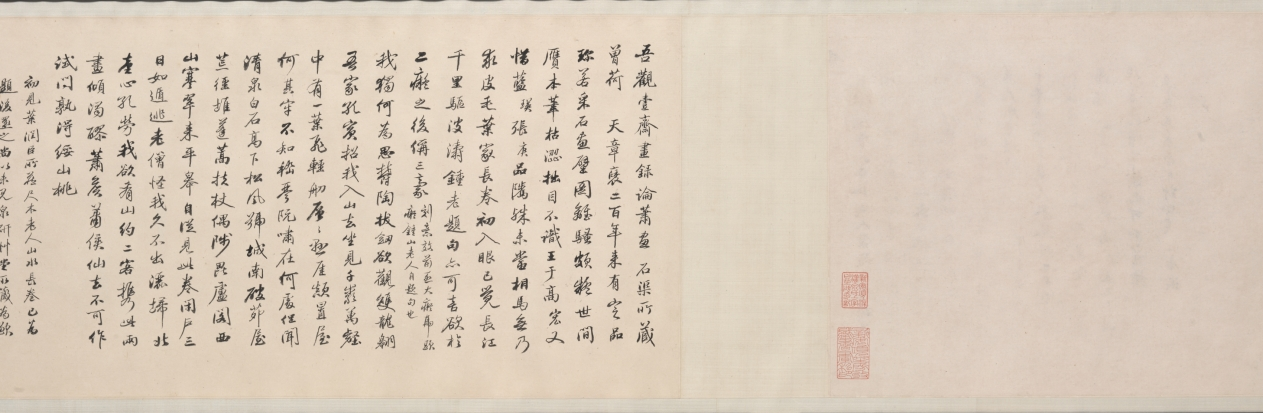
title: Pure Tones among Hills and Waters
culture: China, Qing dynasty (1644-1911)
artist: Xiao Yuncong (Chinese, 1596–1673)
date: 1664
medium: Handscroll; ink and light color on paper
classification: Painting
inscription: 種松發秀色，具是高人心。/ 鑿石築茅屋，長年覆綠陰。/ 白雲無意出，舒卷趨空林。/ 萬籟時一寂，微風墮清音。/ 此情莫可擬，此景誰能論。/ 只向千峰裏，共彈五絃琴。/ 桃花依綠水，不覺又春深。 甲辰花朝題于青蓮閣, 鐘山老人蕭雲從。[印] 鐘山老人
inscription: Title and inscription, dated 1744, and 3 seals of Shen Feng 沈鳳 (1685-1755).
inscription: 4 colophons and 24 additional seals: 1 colophon, dated 1811, and 5 seals of Xiang Yuan 項源 (active about 1811); 1 colophon, dated 1858, and 2 seals of Qi Junzao 祁寯藻 (1793-1866); 1 colophon and 4 seals of Zhang Yunzhong 張允中 (1881–1960?); 4 seals of Jiang Xun 江恂 (active about 1753–after 1780); 1 colophon dated 1943, and 2 seals of Wang Shaoming 汪兆銘 (Wang Jingwei 汪精衛, 1883–1944); 1 seal of Qi Zhiliu 祁之鏐 (active about 1858); 2 seals of Yu Zhimeng 俞芷盟 (second half of 19th century); 4 seals unidentified.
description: Painted at age 68, this landscape is one of Xiao Yuncong’s most mature works. Extraordinary in its combination of fine details with bold brushstrokes and bluish washes, it is also one of his longest compositions in handscroll format, extending over 23 feet. Throughout his lifetime, Xiao visited Nanjing and Yangzhou, where he met with other painters and literati. Regarded as the founder of the Gushu school (姑孰派) of painting, Xiao painted from nature, and his landscapes are informed by his travels, as well as by his experience as a print designer.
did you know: Biographical notes on Xiao Yuncong relate that he did not pursue the career of an official, but "furnished a cottage in the eastern suburbs [of Wuhu in Anhui province] and amused himself playing the qin (zither) and reading every day."